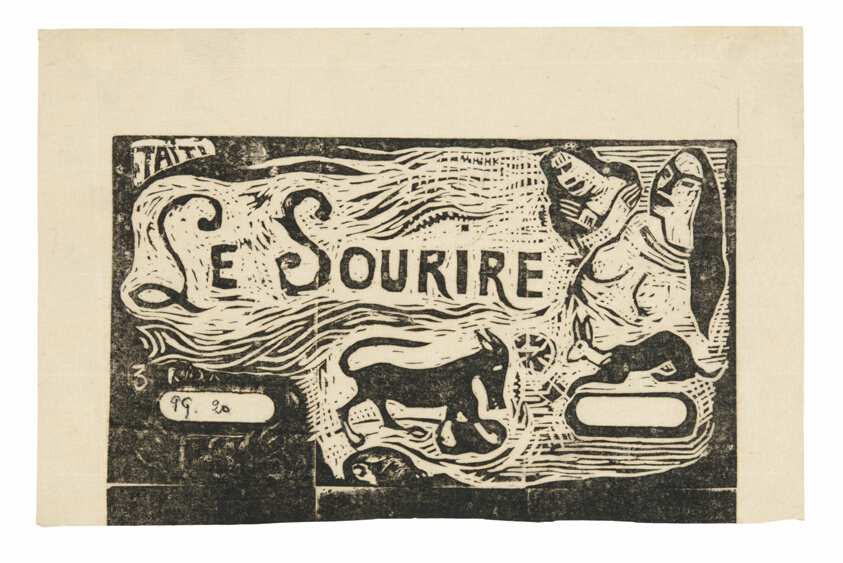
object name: Print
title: Fox, Busts of Two Women, and a Rabbit, headpiece for Le sourire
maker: Paul Gauguin (French, 1848-1903)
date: 1899/1900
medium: Wood-block print in black on thin, ivory Japanese paper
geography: France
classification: woodcut; print; prints and drawing